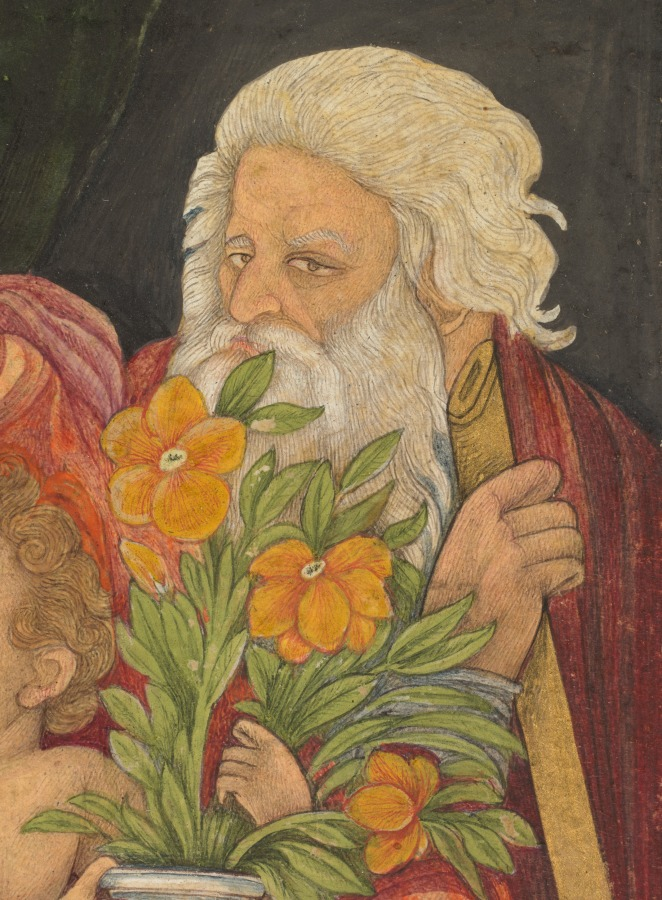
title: The Holy Family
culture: Northern India, Mughal court, early 17th century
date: c. 1620s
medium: Gum tempera and gold on paper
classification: Painting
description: This painting of Joseph, the Virgin Mary, and the infant Jesus is based on European sources, but it also contains several details that are specifically Indian. For example, although Mary is dressed in classical European-style robes, she is adorned with jewelry of rubies and emeralds, the preferred gems of Mughal royalty. Her fingertips are also red with henna, and she wears a bindi on her forehead. The detailed rendering of the vase evokes the Catholic St. Francis as well as Indian worship of the sun. The vessel itself points to the appreciation of Chinese blue-and-white ware imported from imperial Ming-dynasty kilns to the court of Jahangir (reigned 1605–27).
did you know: With hennaed fingertips Mary holds the vase so baby Jesus doesn’t tip it over.